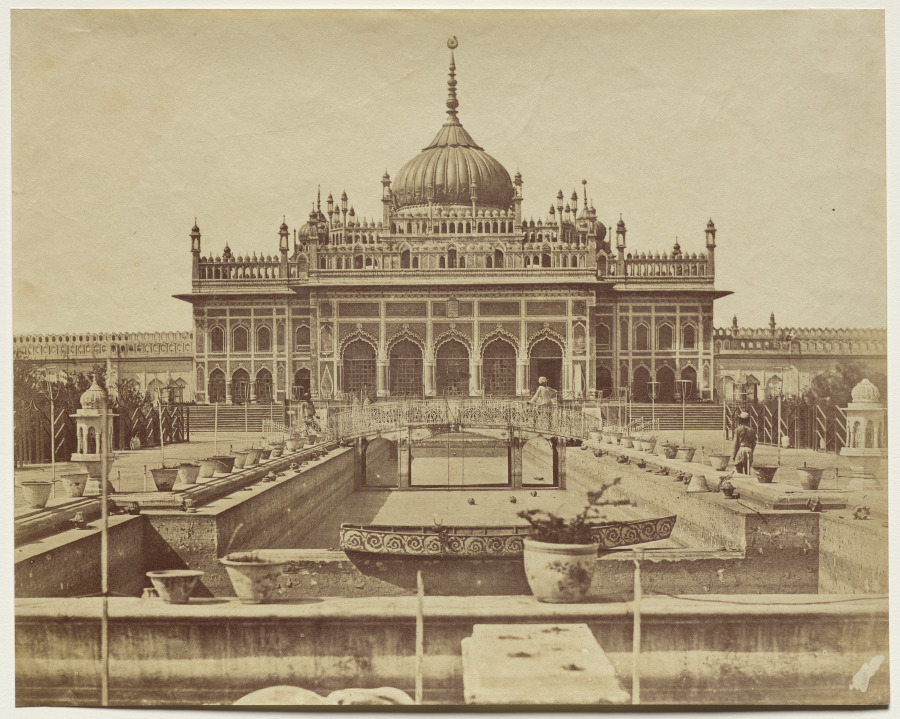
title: The Hoseinabad Emambara and the Tomb of Mahomed Ally Khan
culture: England, 19th century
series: Lucknow After the Siege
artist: Felice A. Beato (British, 1832–1909)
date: 1858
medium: albumen print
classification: Photograph